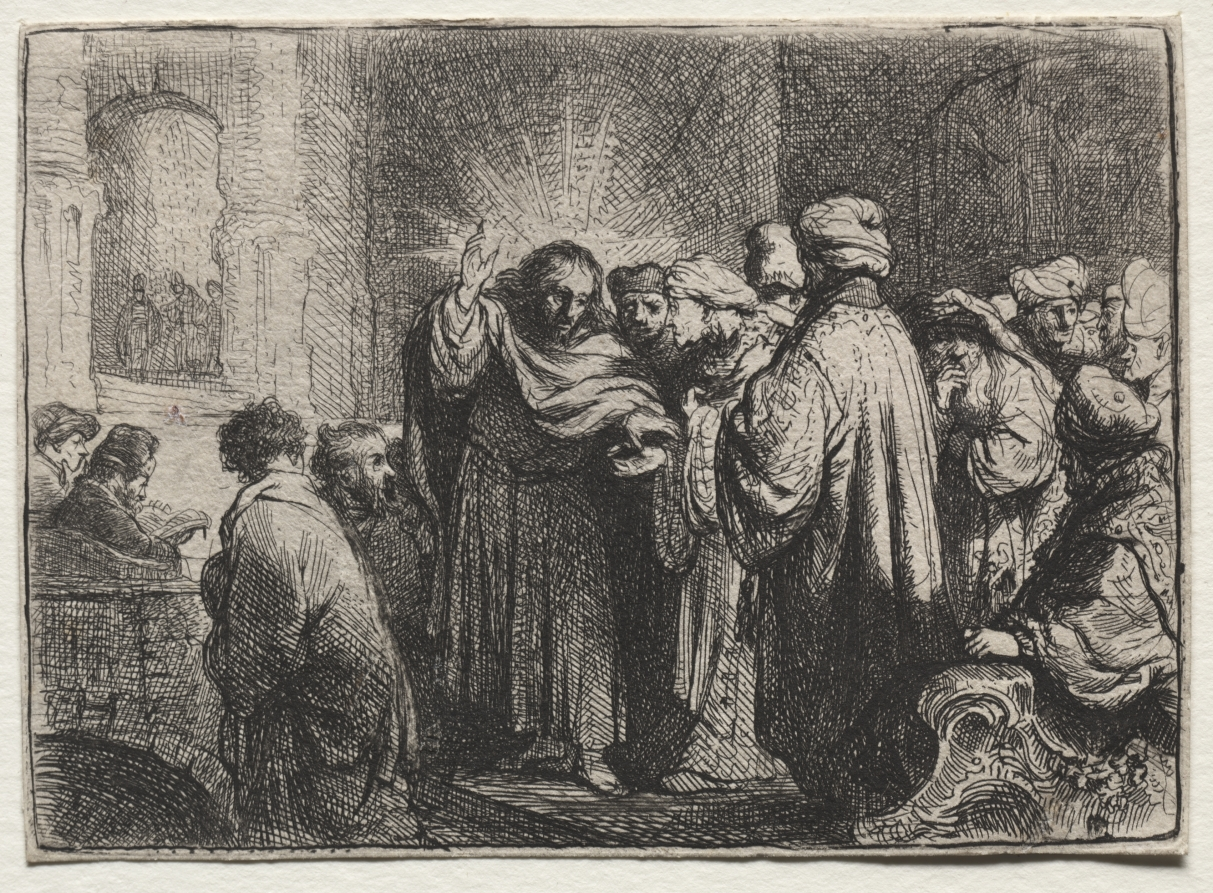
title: The Tribute Money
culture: Netherlands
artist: Rembrandt van Rijn (Dutch, 1606–1669)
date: c. 1635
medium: etching with engraving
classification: Print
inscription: VERSO, upper left, in graphite (erased): [illegible] ; upper right, in graphite: [illegible] ; center, in graphite (partially erased): 68; lower left, in graphite: B. 68; lower left, in graphite: EXV ; lower center, in graphite: R 858 P ; lower center, in graphite: HY[crossed out] ; lower center, in graphite: 34 ; lower right, in graphite (partially erased): 1628